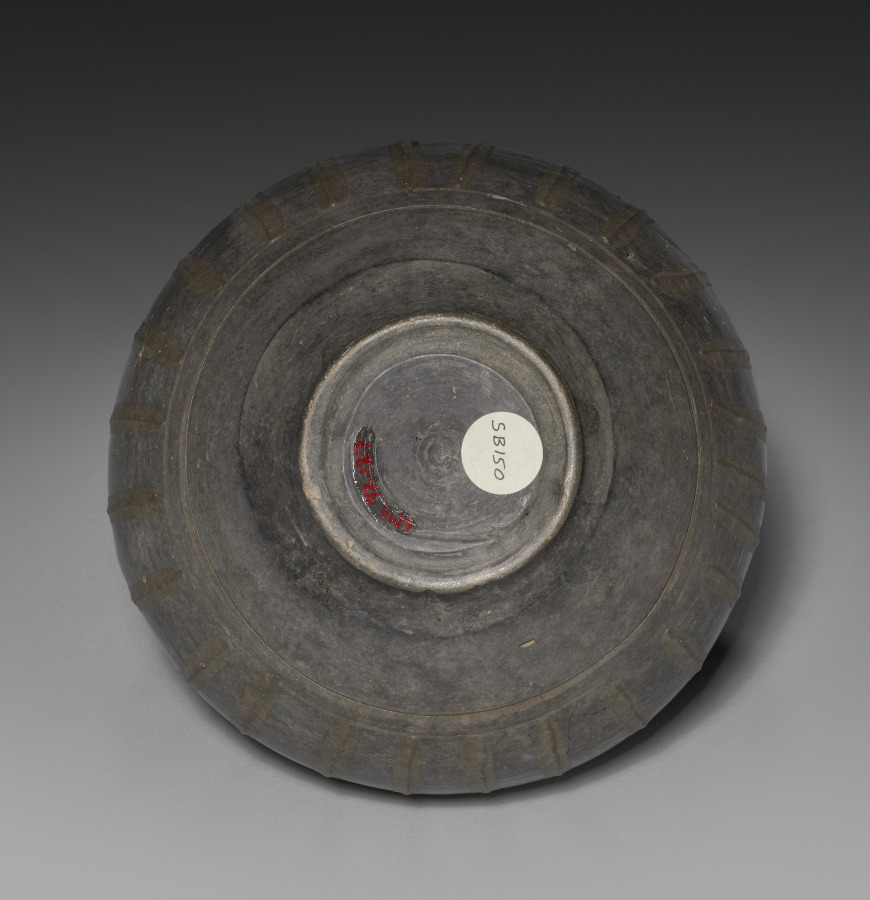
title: Pot with Cover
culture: Rhenish (Cologne), Gallo-Roman, 2nd century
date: 100s CE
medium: tan ware with gray and some brown burnished slip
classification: Ceramic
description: The work of Roman potters is very different from that of their Greek predecessors. Greek clay had allowed potters to throw thin-walled ceramics. Slips (paint) made from this clay had permitted painters to draw complicated scenes and figures with infinite care. As the Roman empire grew to include Germany and Britain, local clays found there were better for producing heavier pottery with three-dimensional decoration like the vases shown here. These jars--decorated with a human face (1992.125), animals (1992.126), a feather pattern (1992.183), a wheat pattern (1992.124), and vertical ribs (1992.127,a) were probably filled with foods or liquids and given either as gifts to an elaborate burial or as offerings to a god's shrine.